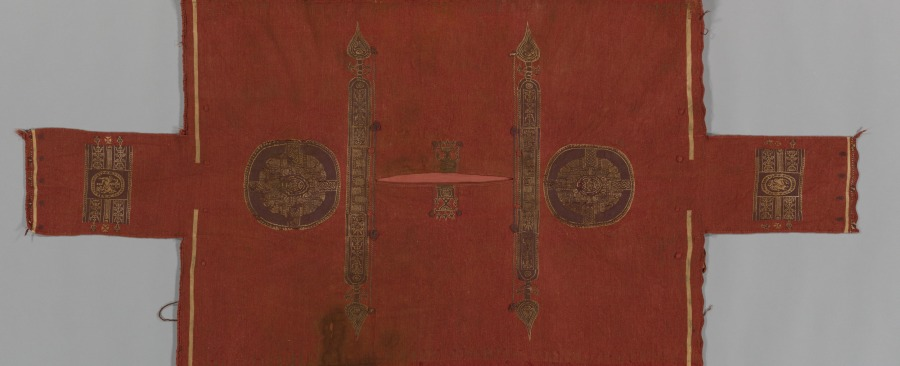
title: Luxurious Woolen Tunic with Decorated Bands and Roundels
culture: Egypt, Umayyad period (661–750)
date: 600s–700s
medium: undyed linen, dyed wool: weft-faced plain weave with slit- and dovetailed-tapestry weave, supplementary weft wrapping, embroidery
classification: Textile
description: Since the mid-200s CE tunics were the main garments worn in Egypt. This unisex tunic is decorated on the front and back with the same geometric and figural motifs, including men on horseback hunting and geometric braided knots that were believed to protect the wearer from harm. A red background was favored in the early Islamic period. Made of thick wool for cooler weather, it was woven in one complete piece with the front, back, and sleeves in this exact shape and size. The tunic’s owner repaired it on the left side and shortened it nearly two inches by sewing a fold around the waist. The discoloration and deterioration indicate the garment may have been used in a burial.